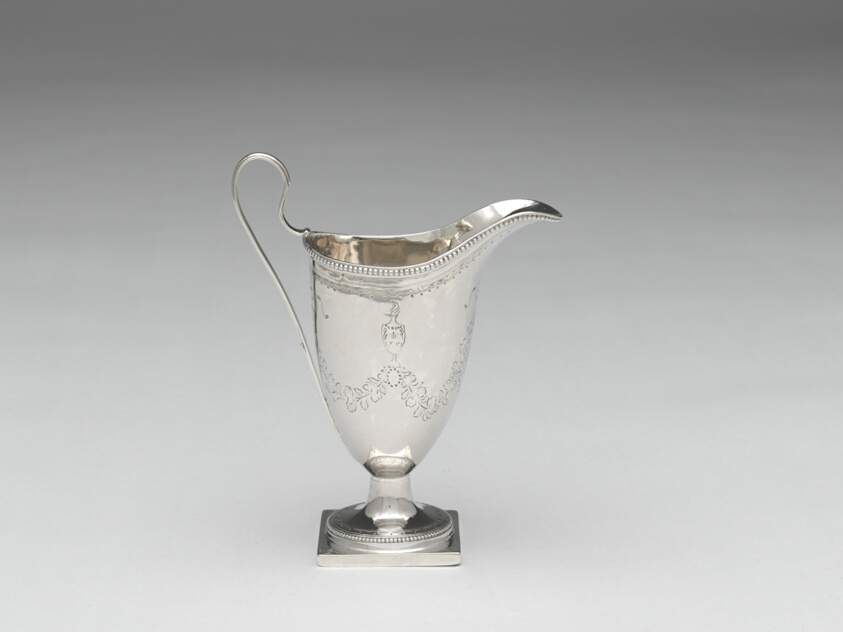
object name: Metalwork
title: Milk Pot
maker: Paul Revere Jr.; American, 1734–1818; Boston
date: 1784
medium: Silver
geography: Boston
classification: creamer; silver; american decorative arts; american arts; decorative arts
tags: dining, drinking